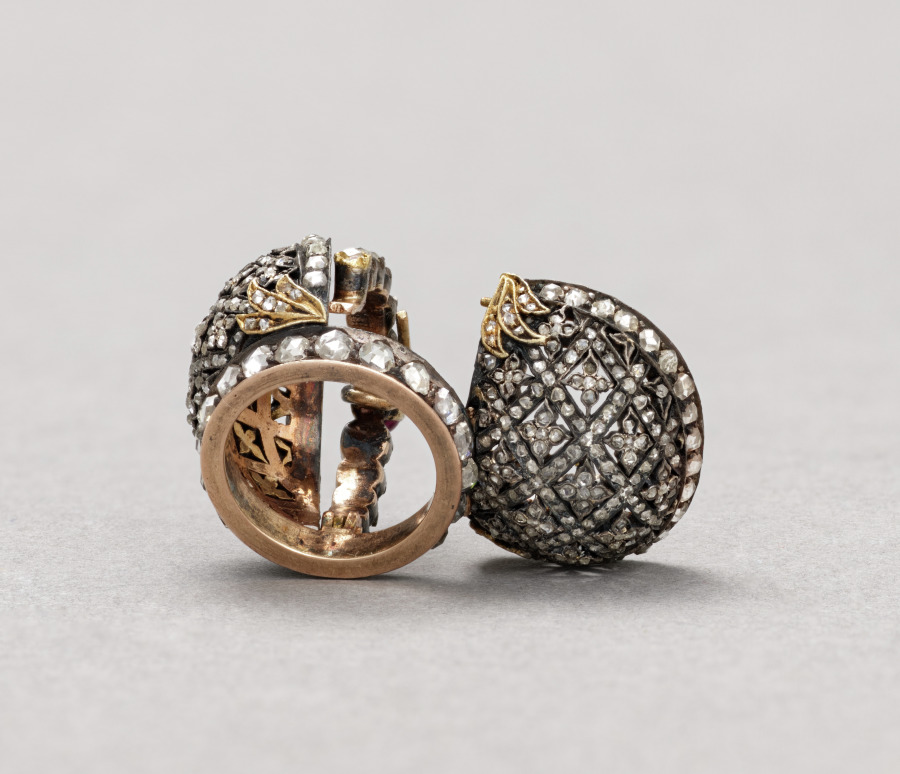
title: Miniature Crown Surprise from the Lapis Lazuli Easter Egg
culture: Russia, St. Petersburg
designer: attributed to Peter Carl Fabergé (Russian, 1846–1920)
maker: attributed to House of Fabergé (Russian, 1842–1918)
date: c. 1885–90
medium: gold, enamel, lapis lazuli, pearls, diamonds, rubies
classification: Miscellaneous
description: This Easter egg, like the subsequent ones produced by Fabergé for the imperial family, contains a surprise when opened. In this case, the egg opens to display a yellow enameled cover, resembling an egg yolk, which then opens to reveal a tiny replica of the Russian imperial crown, containing either a ruby or a pink sapphire suspended on a chain.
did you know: The tiny diamond encrusted crown surprise is a replica of the Russian imperial crown made for Empress Catherine the Great in the 1700s.